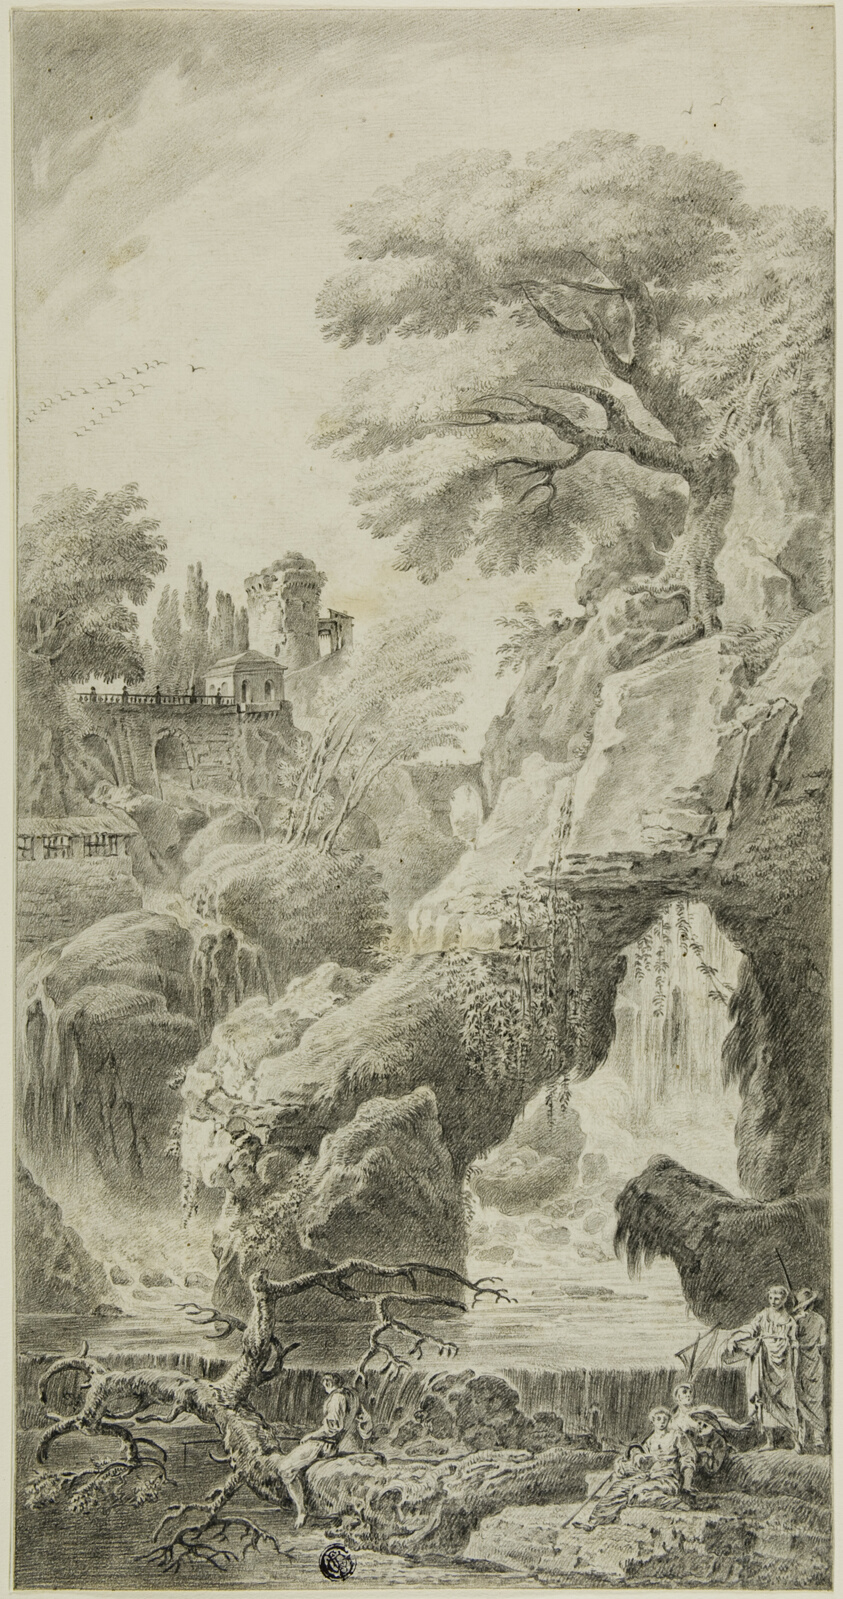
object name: Drawing and Watercolor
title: Figures in a Rocky Landscape with Waterfall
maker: Attributed to Johann Samuel Bach; German, 1749-1778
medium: Black chalk with traces of charcoal on ivory laid paper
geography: Germany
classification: graphite; drawings (visual works); prints and drawing